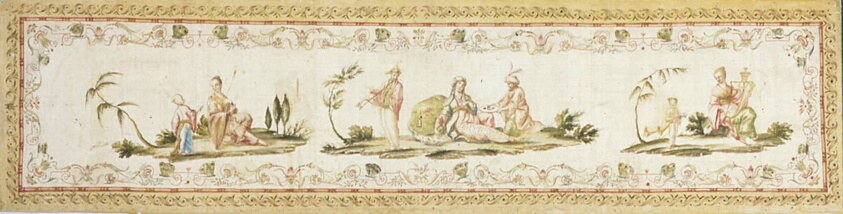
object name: Textile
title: Panel (Furnishing Fabric)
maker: France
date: 1775/1800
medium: Silk, plain weave; painted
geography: France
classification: textile; weaving - printed; furnishing textile